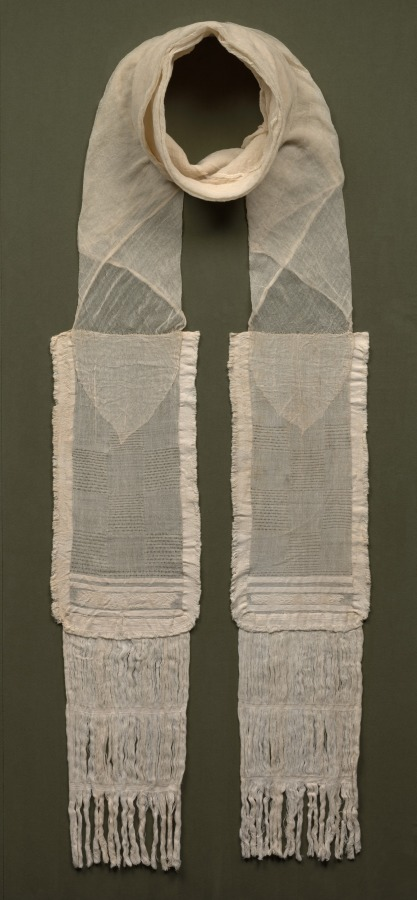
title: Turban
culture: Peru, North Coast, Chimú style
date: 1485–1640 (radiocarbon date, 95.4% probability)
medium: Cotton; plain weave, brocaded and complex alternating gauze with 5 shots of plain weave between gauze shots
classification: Garment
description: Chimú garments like this one consist of a large, rectangular central section—here measuring some 65 inches by 50 inches—with decorated tabs stitched to two opposite corners. Such garments probably were worn as turbans but we do not understand exactly how. For the purpose of display, the plain central section of this example has been folded to form a wide band, with the tabs arranged on either side.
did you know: The white cotton yarns used to make this textile are only 0.1 to 0.2 millimeters in diameter.